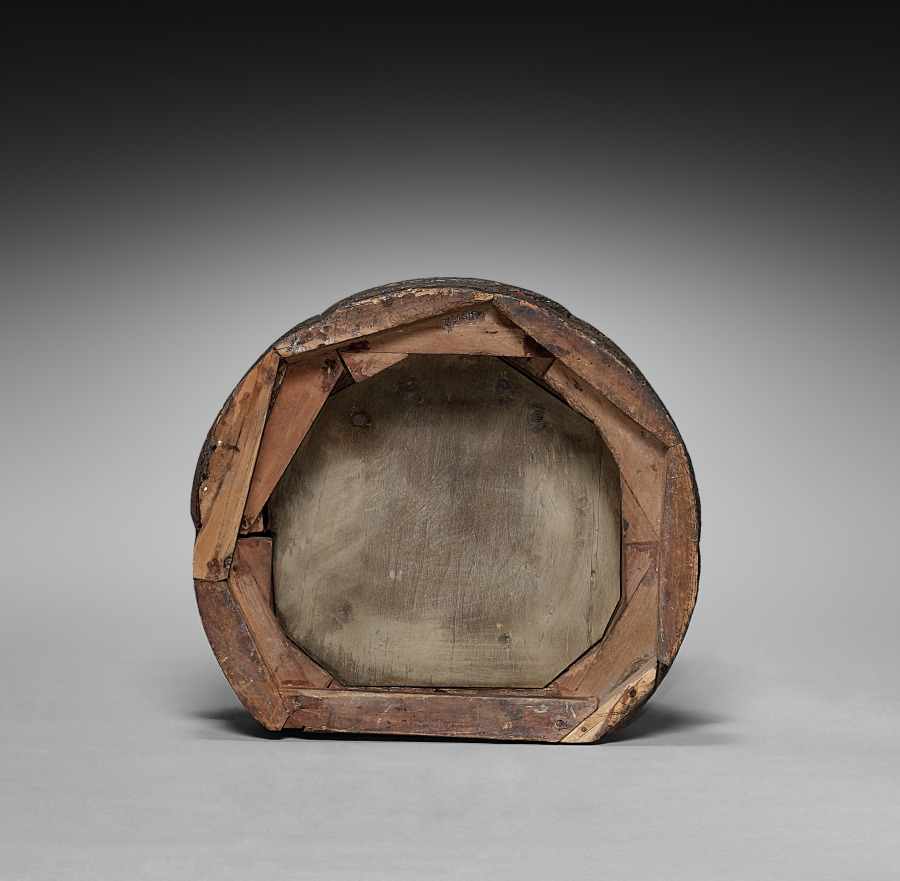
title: Amida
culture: Japan, Kamakura period (1185–1333)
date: 1200s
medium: Wood with lacquer and gilding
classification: Sculpture